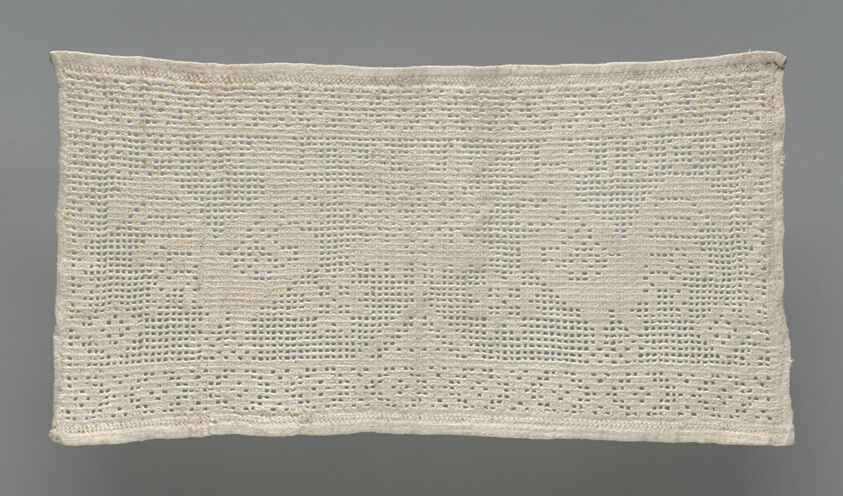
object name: Textile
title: Fragment (From an Altar Frontal)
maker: Italy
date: 1801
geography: Italy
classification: textile; needlework (visual works); liturgical; altar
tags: altar